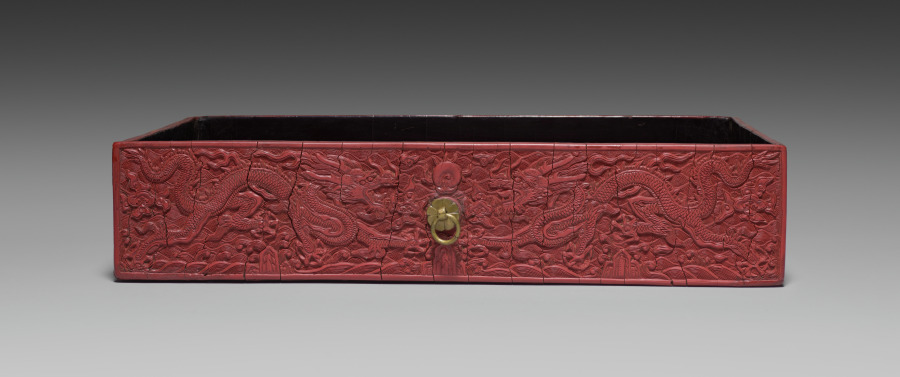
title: Drawer for a Tihong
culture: China, Ming dynasty (1368-1644), Wanli reign (1572-1620)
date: 1585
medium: carved cinnabar lacquer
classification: Lacquer